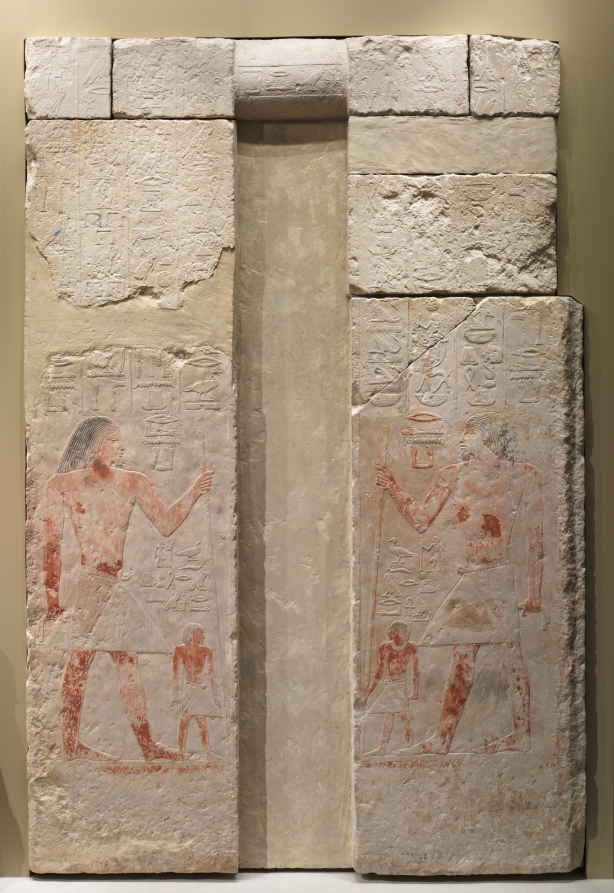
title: False Door of Nykara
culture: Egypt, Old Kingdom (2647–2124 BCE), Dynasty 5, reign of Nyuserre (2445–2422 BCE) or later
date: 2408–2341 BCE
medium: limestone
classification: Sculpture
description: The focal point of the tomb chapel was a false door built into its western wall. Food offerings for the deceased tomb owners were placed in front of it, and it was believed that the soul could pass through it. The inscriptions list Nykara's numerous titles both at court and in the state bureaucracy. His eldest son, Ankhmara, who succeeded Nykara in the granary administration, is shown in much smaller scale in front of him.